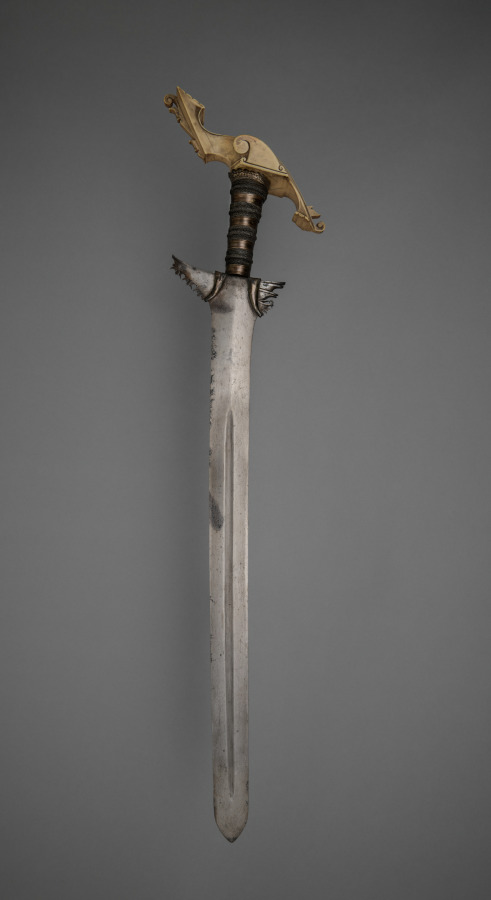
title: Sword (Kalis or Sundang)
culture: Philippines, Mindanao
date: before 1916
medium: Blade: metal; grip: brass ferrule and silver wire; pommel: ivory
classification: Arms and Armor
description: This sword features a long kalis blade with a straight profile and deep fuller running nearly the entire length. The hilt terminates in an enormous ivory pommel, a prestige marker associated with high-ranking ownership in the Sulu and Lake Lanao regions. The commanding blade, functional and symbolic clamps, silver-braided grip, and pommel identify this as an exceptional example of elite Moro weaponry used among the Tausug or Maranao groups in the southern Philippines.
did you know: The asang-asang (fish gill) clamps at the blade’s base stabilize it while referencing the purifying quality attributed to fish gills.